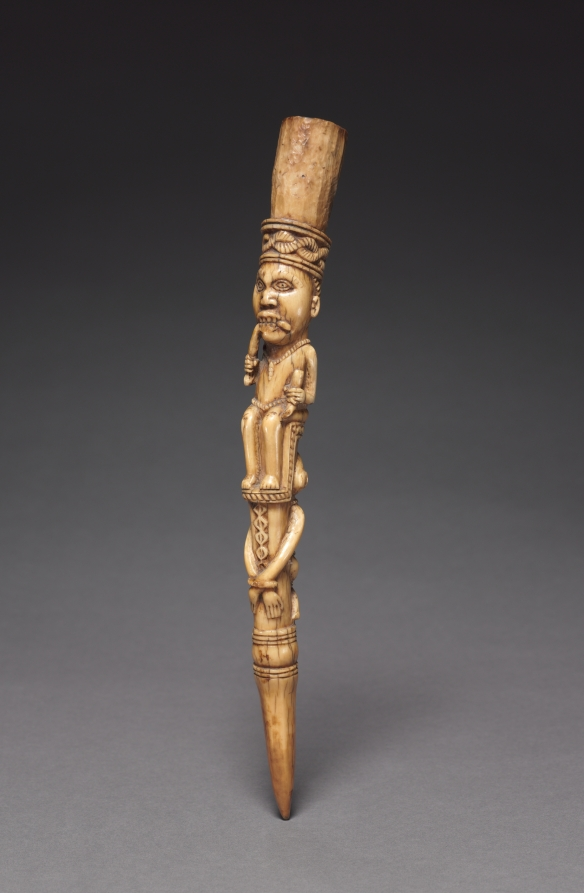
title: Scepter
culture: Africa, Central Africa, Democratic Republic of Congo (most likely), Cabinda, or Republic of Congo, probably Kongo-style (Yombe sub-group) carver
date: late 1800s–early 1900s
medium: ivory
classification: Implements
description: Used by male chiefs, ivory scepters were symbols of status indicating worldly authority and supernatural influence. The use of ivory implies that the chief has the fatal power of an elephant. The figurine shows a chief enthroned on the bound body of a criminal destined for such a death. A medicine package would have been enclosed within the container extending from the figure’s head, bestowing supernatural powers.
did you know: Scepters often represent the chief sitting atop a bound prisoner or attribute to a violent death.